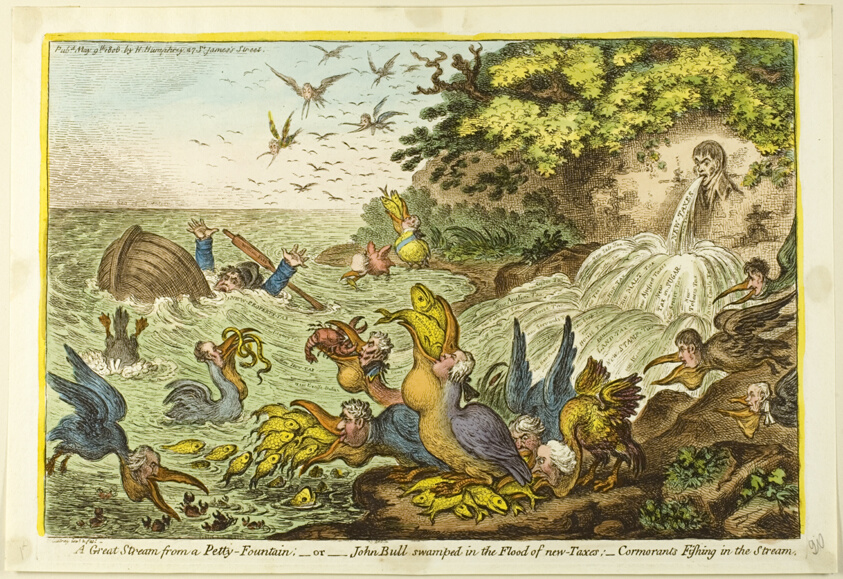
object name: Print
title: A Great Stream from a Pretty Fountain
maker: James Gillray (English, 1756-1815); published by Hannah Humphrey (English, c. 1745-1818)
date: published May 9, 1806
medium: Hand-colored etching on paper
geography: England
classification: etching; print; prints and drawing